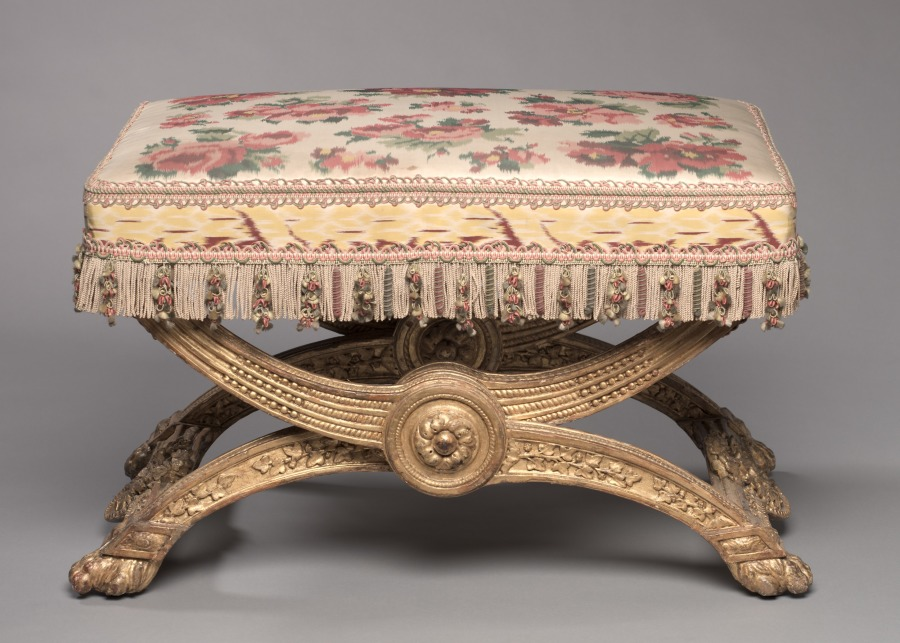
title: Pair of Stools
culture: France, 18th century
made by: Jean-Baptiste-Claude Sené (French, 1748–1803)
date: 1786–87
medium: carved and gilded wood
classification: Furniture and woodwork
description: These stools were made for the gaming room of Marie-Antoinette at the Chateau de Compiègne and later placed in the Chateau de Fontainebleau.